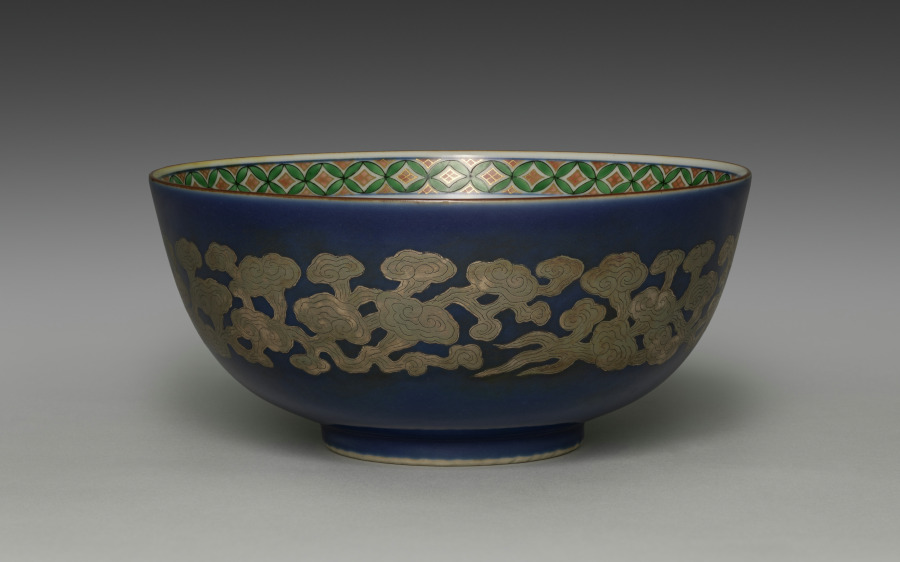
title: Bowl with Numinous Fungi and Kirin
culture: Japan, Meiji period (1868–1912)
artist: Seifū Yohei III (Japanese, 1851–1914)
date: 1893–1900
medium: Porcelain with cobalt blue glaze, overglaze color enamel, and silver painting overlay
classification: Ceramic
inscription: 清風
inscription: 清風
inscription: 帝室技芸員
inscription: 清風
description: The complex design of this bowl is also technically sophisticated in its execution. On the interior, Yohei III has placed a mythical beast called a kirin (Chinese, qilin) within a double-banded circle painted in cobalt blue under the glaze. Around the interior of the mouth, bordered at top and bottom with underglaze blue under a brown iron oxide painted rim, he has painted a continuous coin pattern with a red wash and green color enamels. The pattern is further defined and embellished with black iron outlining the green- and gold-painted diamonds over the diluted red. The inside is otherwise left white. On the exterior, the body has a dark blue glaze and an overlaid silver design of reishi with incised lines for detail.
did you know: Inside the bowl is an auspicious, mythical deerlike creature called kirin in Japanese (麒麟 or qilin in Chinese).